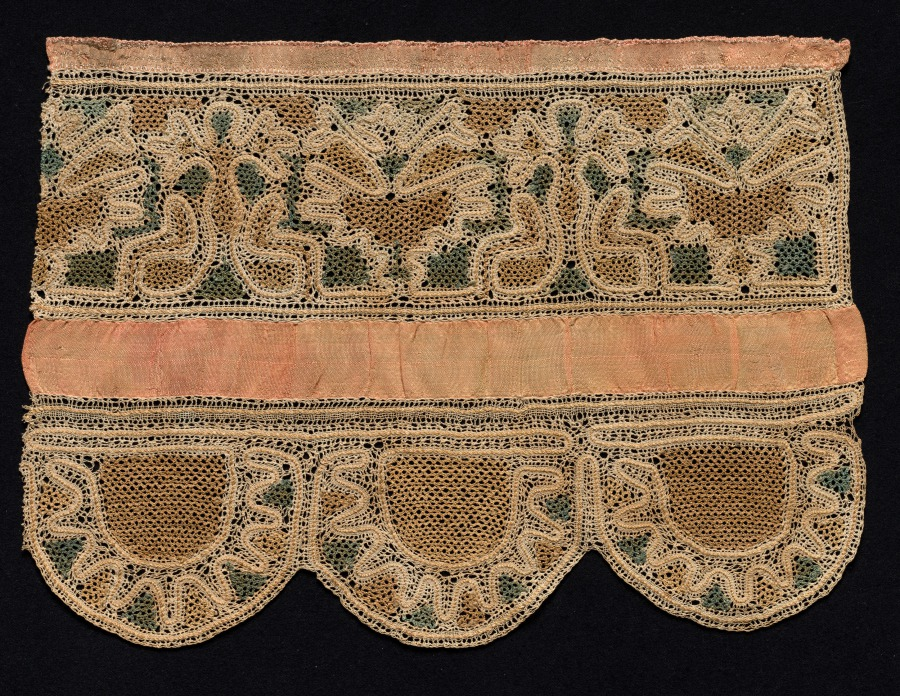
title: Lace Towel End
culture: Russia, Nizhny-Novgorod province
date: c. 1700s–1800s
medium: cotton or linen (est.); straight (continuous) bobbin lace (Vologda tape lace). The tape forms figural or plant motifs outlined with gimp (heavy cord) with a polychrome plaited ground linking the tape; applied silk (est.) ribbon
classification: Lace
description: This lace was used to embellish a towel end. Textiles of this type are valuable for their lace work depicting ancient folk motifs, ritual significance, exemplification of the role of textiles in Russian society, and connection to a prominent woman collector, Natalia de Shabelsky, without whom this textile and others like it might have been lost.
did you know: Lace making was a common tradition in many cultures because it displayed the skill of the mother or daughter who made the lace.